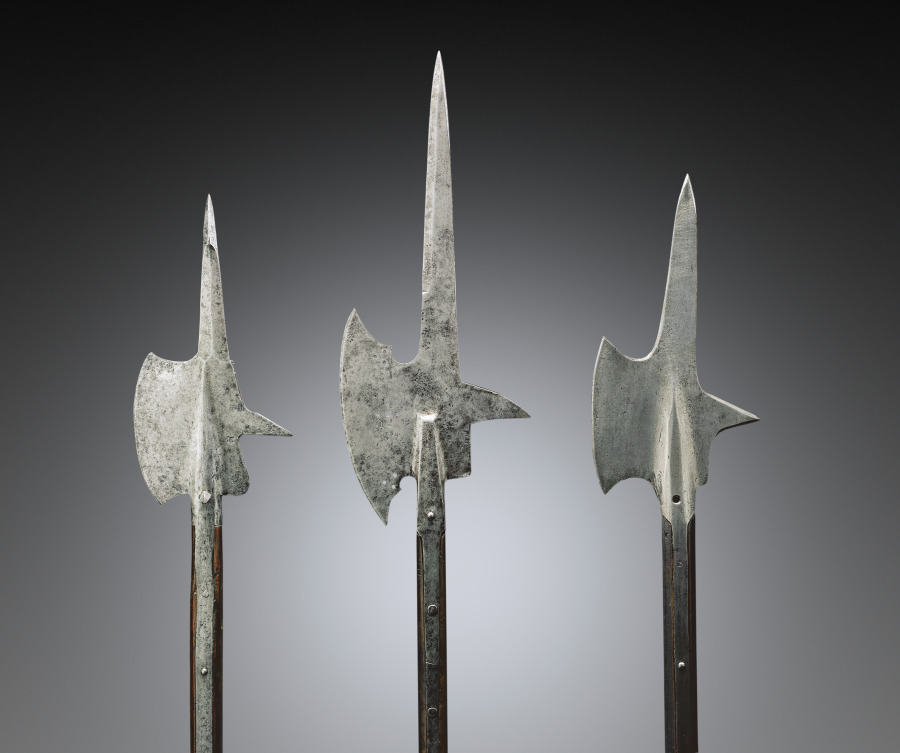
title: Halberd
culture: Germany (?)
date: 1475–1500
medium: steel, pierced circular holes; wood haft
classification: Arms and Armor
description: The halberd was a staff weapon favored by European infantries (foot soldiers) of the 1400s and 1500s for its versatility and deadly effect. The word halberd comes from the German words Halm (staff) and Barte (axe). The halberd is, in fact, an axe that served multiple functions: the axe blade was used for hacking, the spike for thrusting, and the beak for piercing plate armor or for pulling a knight from his saddle. The halberd was used by shock troops (those who lead an attack) and by Swiss and German mercenaries. After about 1550, the halberd gradually became less functional. Its large blade provided space for coats of arms and insignia. By the late 1500s, the parade halberd had become a ceremonial weapon for palace guards.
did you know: The first halberds are believed to have been made for warriors of medieval Switzerland.